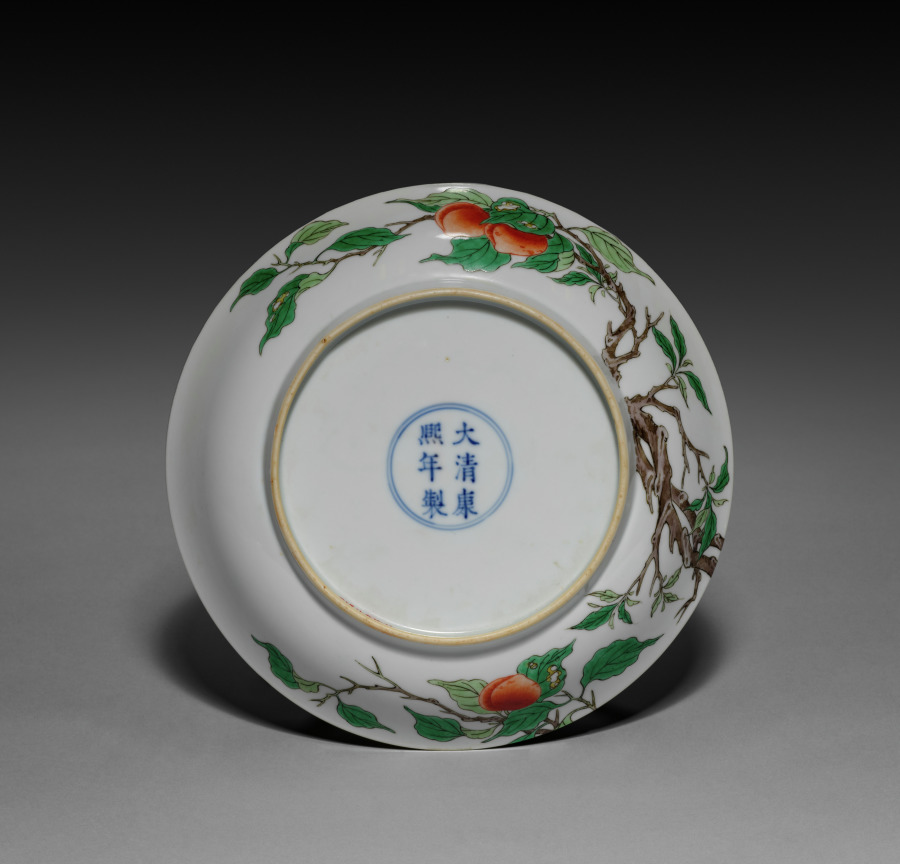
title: Dish with Bird on Fruit Tree Branch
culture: China, Jiangxi province, Jingdezhen kilns, Qing dynasty (1644–1911), Kangxi mark and reign (1662–1722)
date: 1662–1722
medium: Porcelain with famille-verte overglaze enamel decoration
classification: Ceramic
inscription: 大清康熙年制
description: Porcelain decorators in the Qing dynasty broadened the palette of naturalistic colors available to their predecessors with the technique of overglaze painting. They carefully painted designs in low-fire, lead-based glazes on top of undecorated glazed porcelains that had already been fired to the required 1200 degrees Celsius. After the pieces were painted, they were fired a second time to set and fix the glazes to the surface. With sharp images in translucent colors on thin white bodies, porcelains such as these mark the final technical and aesthetic accomplishment of the Chinese ceramic tradition.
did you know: This dish is related to the set created for the Kangxi emperor's 60th birthday.